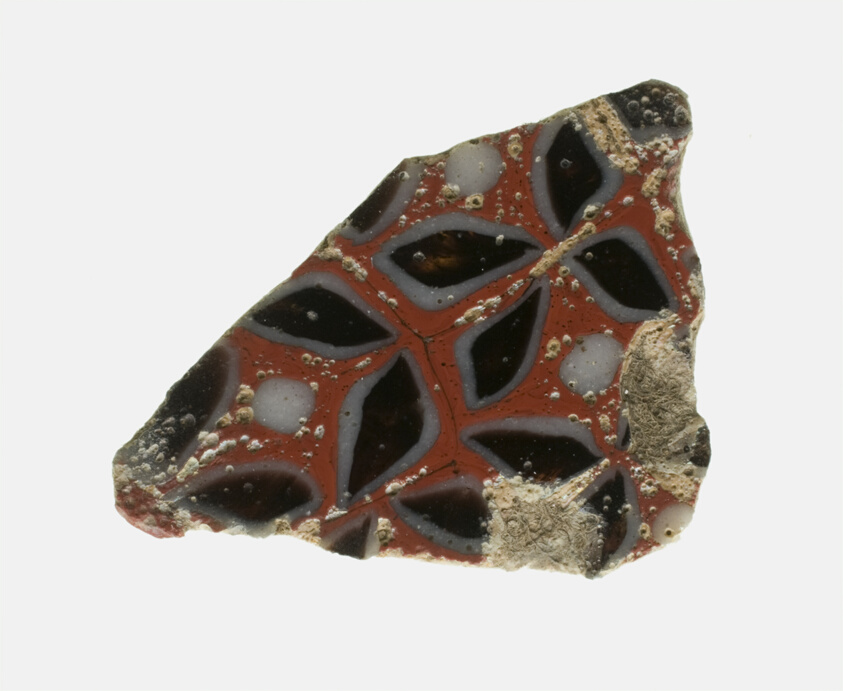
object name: Decorative Arts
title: Fragment of a Floral Inlay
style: greco-roman (egyptian), roman (ancient, style or period), egyptian, ptolemaic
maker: Egyptian or Roman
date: Ptolemaic Period–Roman Period, (1st century BCE–1st century CE)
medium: Glass, mosaic technique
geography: Roman Empire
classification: fragment; decorative arts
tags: floral